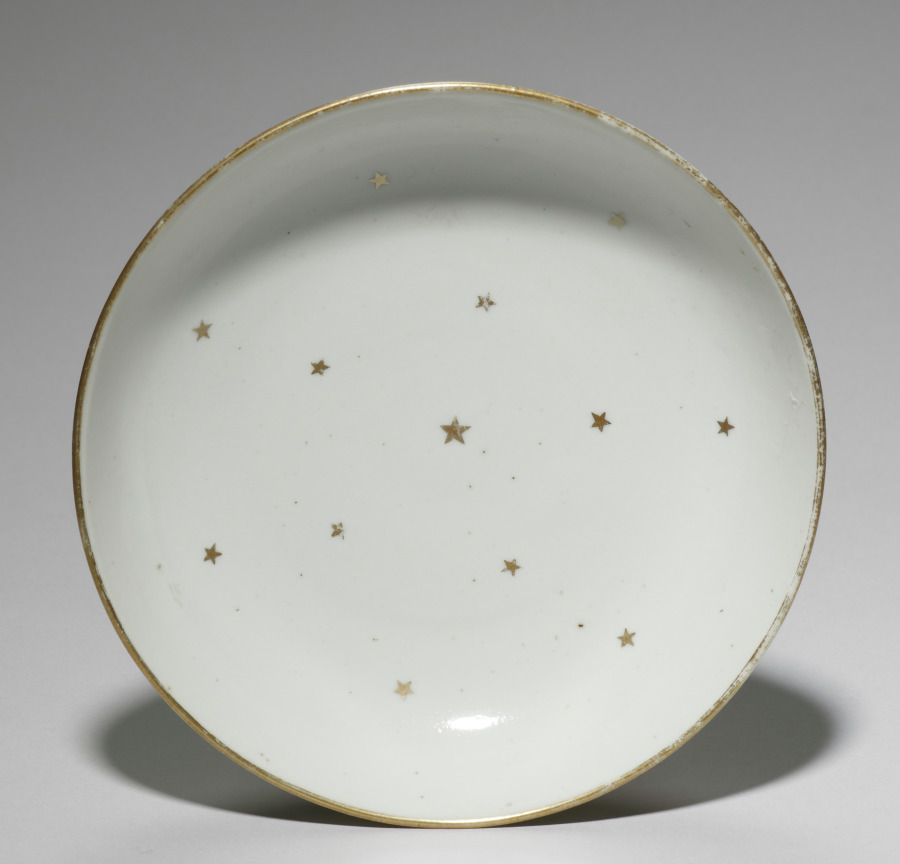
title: Saucer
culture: China, Chinese Export, 19th century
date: 1800s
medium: porcelain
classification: Ceramic